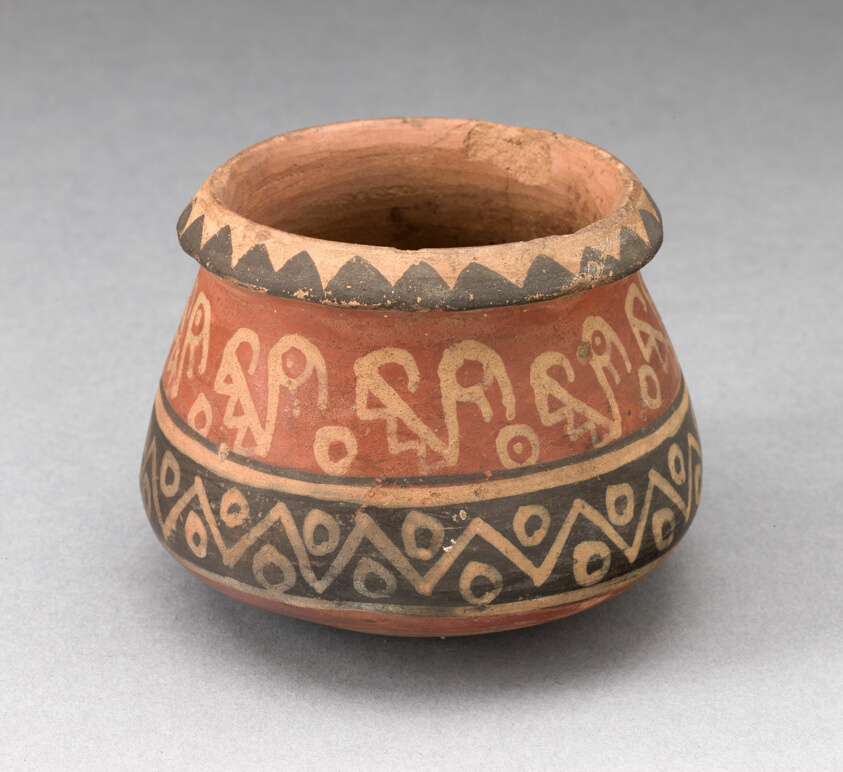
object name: Vessel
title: MIiniature Jar with Geometric Motifs and Abstract Birds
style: ica, late intermediate period, Pre-Columbian, americas, Arts of the Americas, andean, andes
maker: Inca (South coast or southern highlands, Peru)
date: 1450–1532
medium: Ceramic and pigment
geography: Southern Peru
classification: earthenware; ceramics; vessel; art of the americas